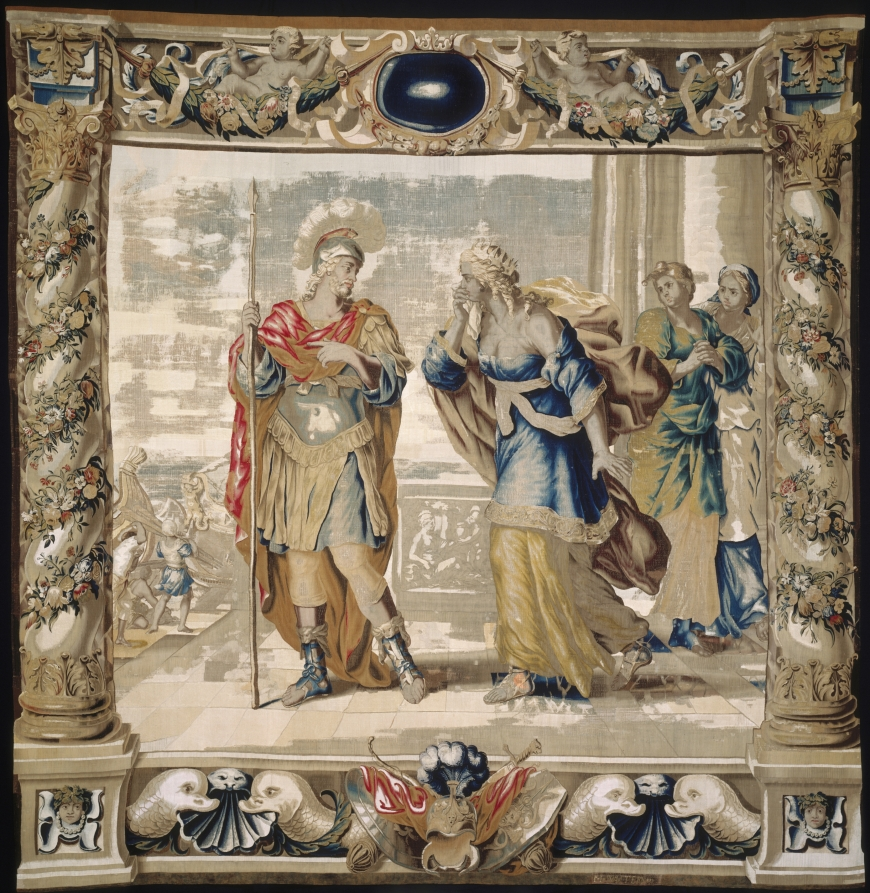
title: Aeneas says Farewell to Dido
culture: Belgium, 17th century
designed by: Giovanni Francesco Romanelli (Italian, 1610–1662)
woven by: Michael Wauters (Flemish, 1679)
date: 1679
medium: tapestry weave: silk and wool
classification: Tapestry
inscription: signed lower right: M. Wavters.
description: Ready to depart on the fleet which you can see behind him, Aeneas tells the distraught Dido that he must follow his destiny and leave Carthage.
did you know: This tapestry is one from a series of eight that depicts the tragic love story of Dido and Aeneas. They were gifted to the museum for display in the armor court.